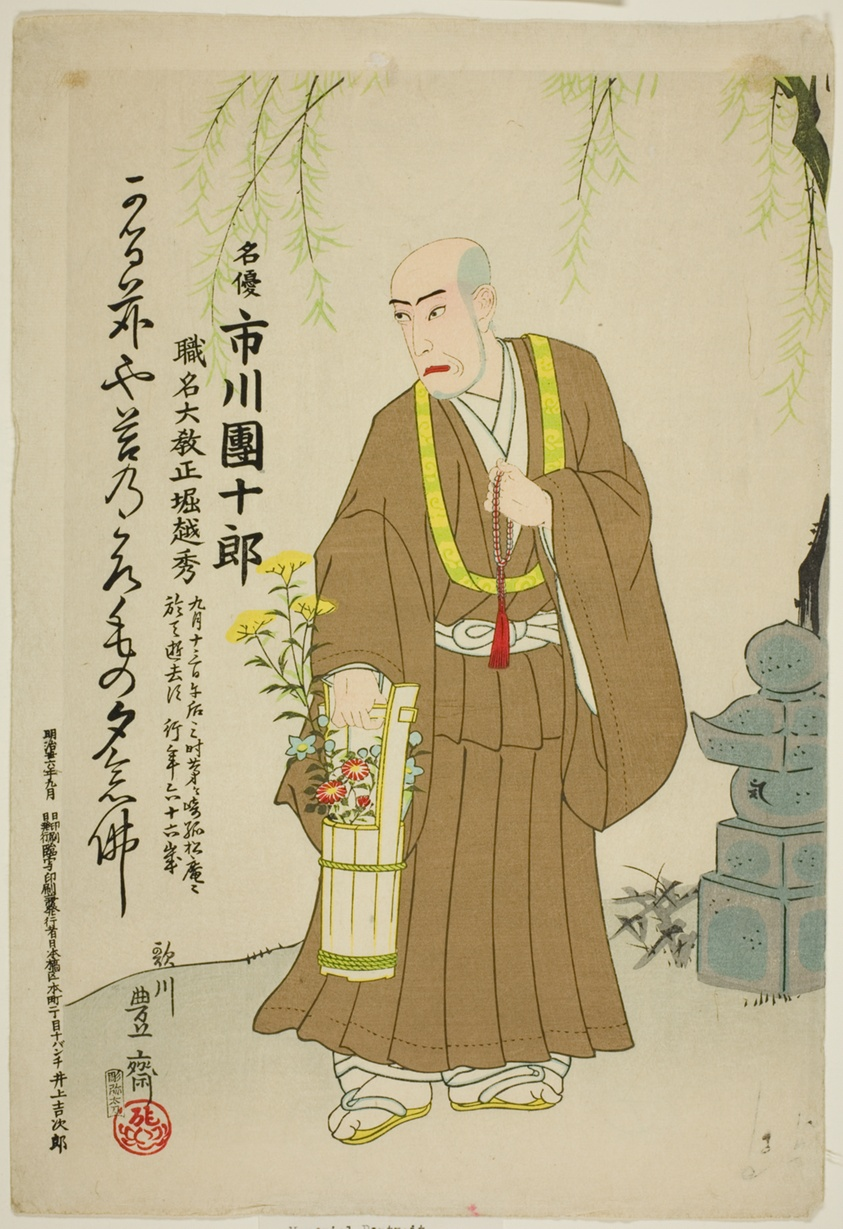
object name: Print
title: Memorial Portrait of the Actor Ichikawa Danjuro IX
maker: Utagawa Kunisada III (Kunimasa IV, Toyokuni V) (Japanese, 1848–1920)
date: 1903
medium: Color woodblock print; oban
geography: Japan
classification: print; asian art